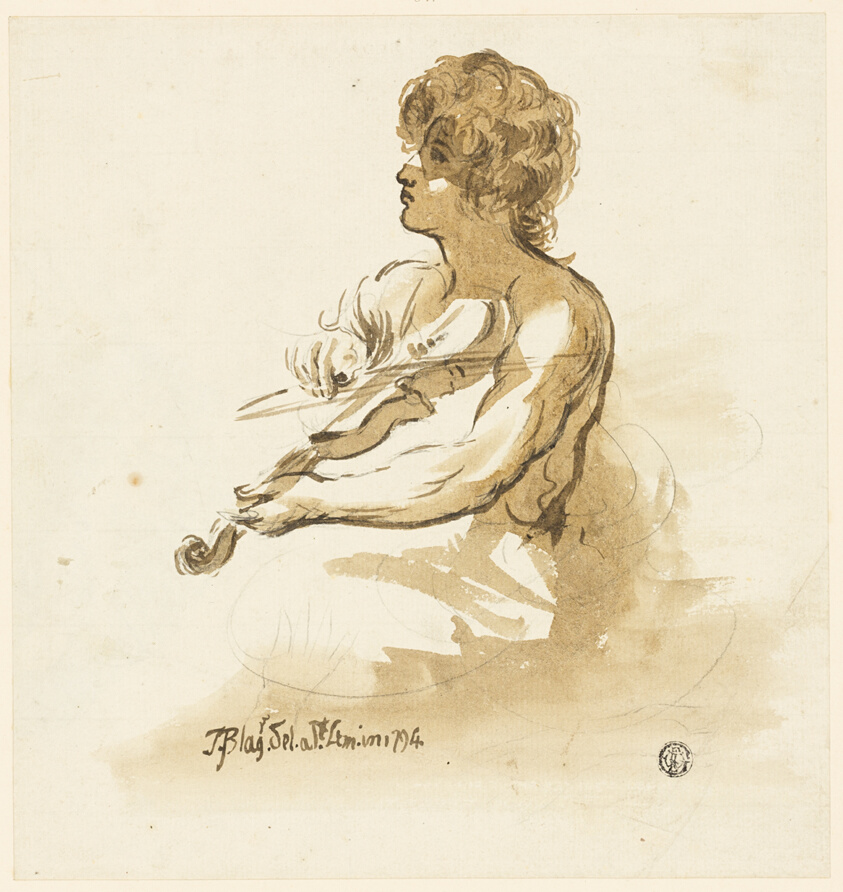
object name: Drawing and Watercolor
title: Young Violinist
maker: Unknown English artist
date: 1794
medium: Brush and brown wash over graphite, on ivory laid paper, laid down on cream wove card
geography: England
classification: ink or chalk wash; drawings (visual works); prints and drawing